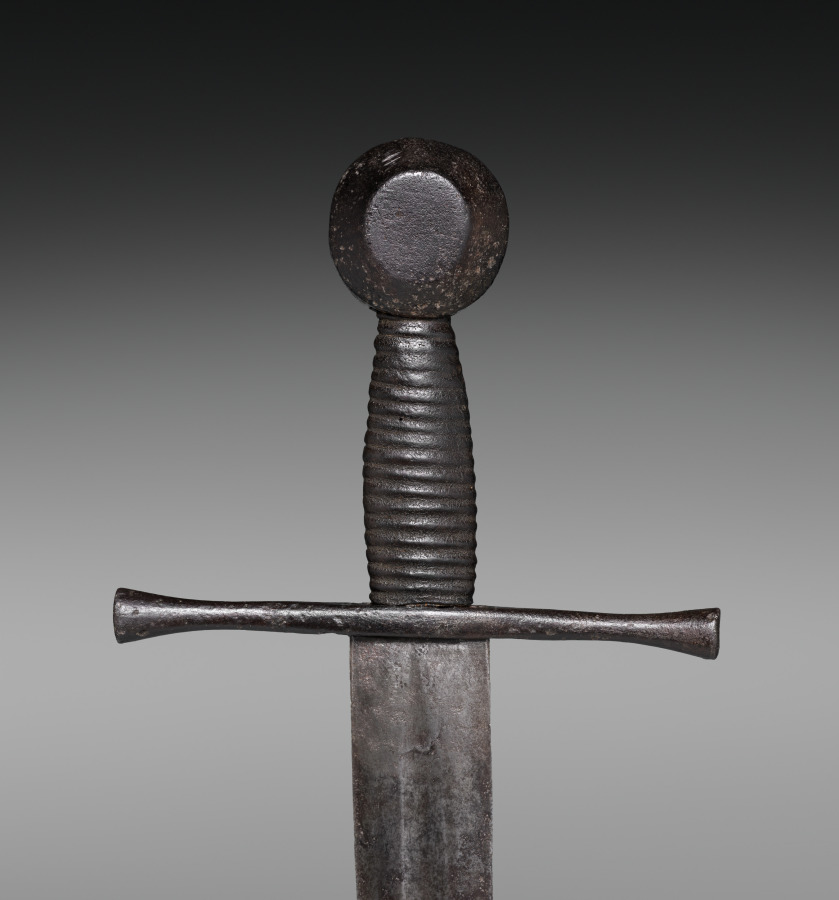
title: Sword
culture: Germany (?)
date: 1400s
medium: steel; wood and leather grip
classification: Arms and Armor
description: During medieval times, everyday objects carried deep spiritual meanings. The knight's sword was perceived as the noblest of weapons because its shape symbolized the cross on which Christ died.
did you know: The unornamented surfaces and signs of use on this sword and those similar to it lead us to believe that they were used in battle. Despite their utilitarian purpose, the blacksmith added details to the handles and hilts to make them visually appealing.